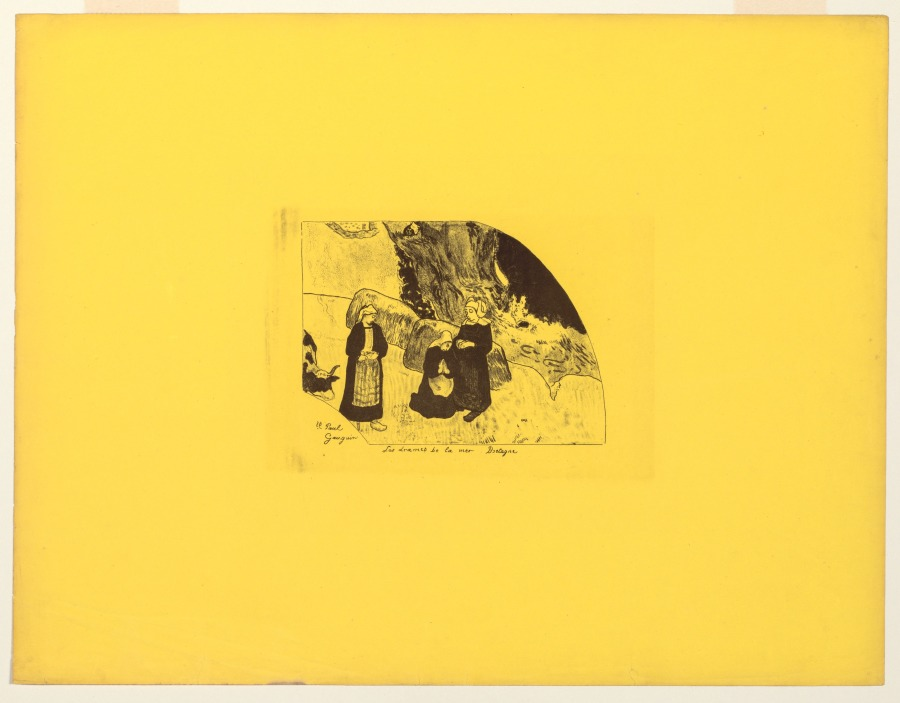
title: Volpini Suite: Dramas of the Sea: Brittany (Les Drames de la Mer, Bretagne)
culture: France, 19th century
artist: Paul Gauguin (French, 1848–1903)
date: 1889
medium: zincograph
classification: Print